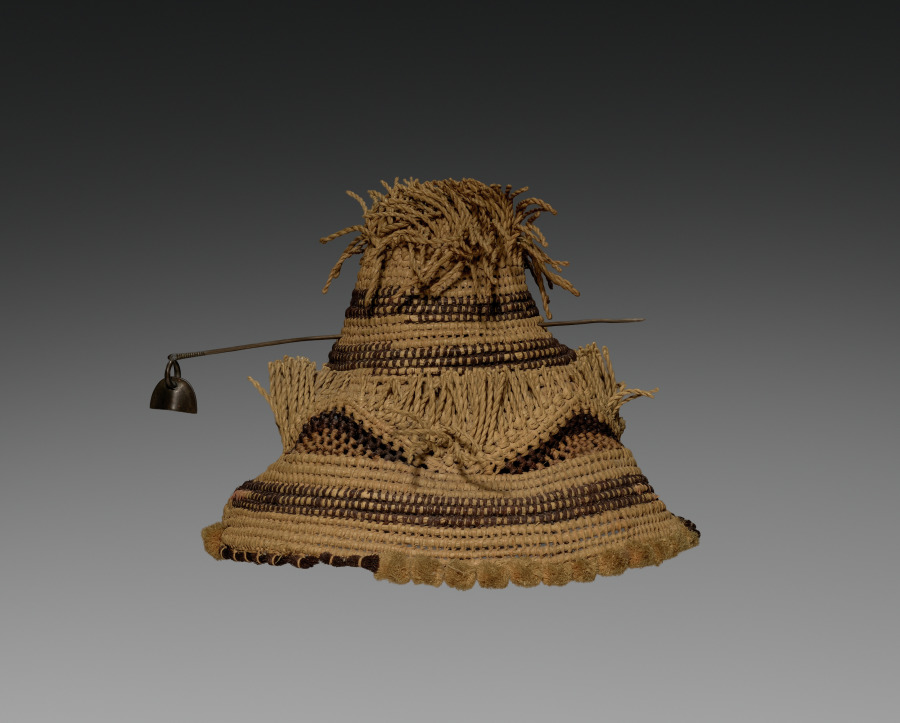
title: Hat (laket mishiing) with Pin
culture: Africa, Central Africa, Democratic Republic of Congo, early 20th century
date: early 1900s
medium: Raffia, metal, and dye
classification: Garment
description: Titled Kuba men and prominent women wear the laket, a small ornate dome-shaped hat. An essential fashion item of adult men in good social standing, it focuses special attention on the head as a significant marker of individual identity, ethnic affiliation, status, and role in society. This prestige object is secured on the crown of the head with a nine-and-a-half-inch metal pin that pierces through the hat onto a clump of hair. The laket is made from raffia palm fiber coiled into threads and woven in two alternating patterns and contrasting light and dark (dyed) wefts. There are two examples of the laket: the plain type with the flat top, and the more elaborate type called the laket mishiing.